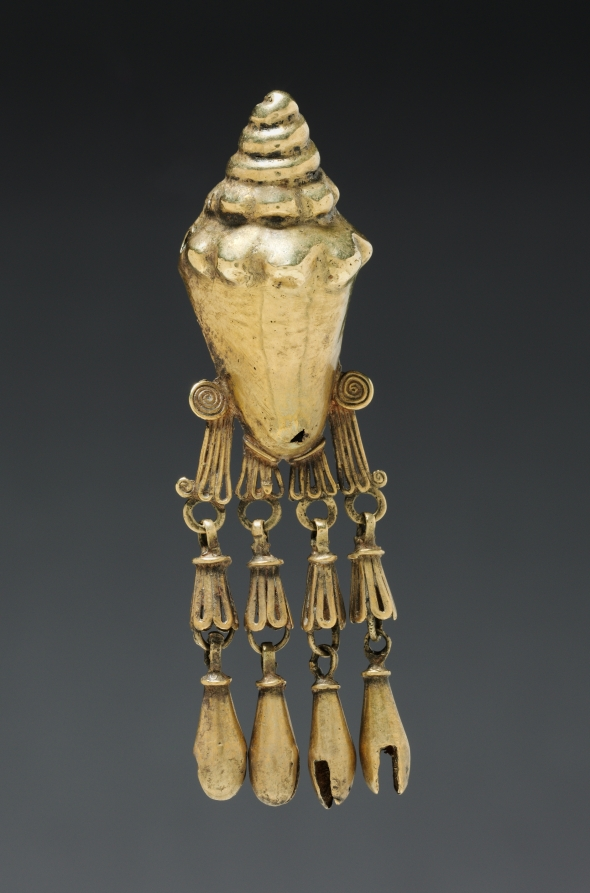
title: Shell Pendant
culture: Mexico, Oaxaca, Mixtec style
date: c. 1200–1519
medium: gold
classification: Jewelry